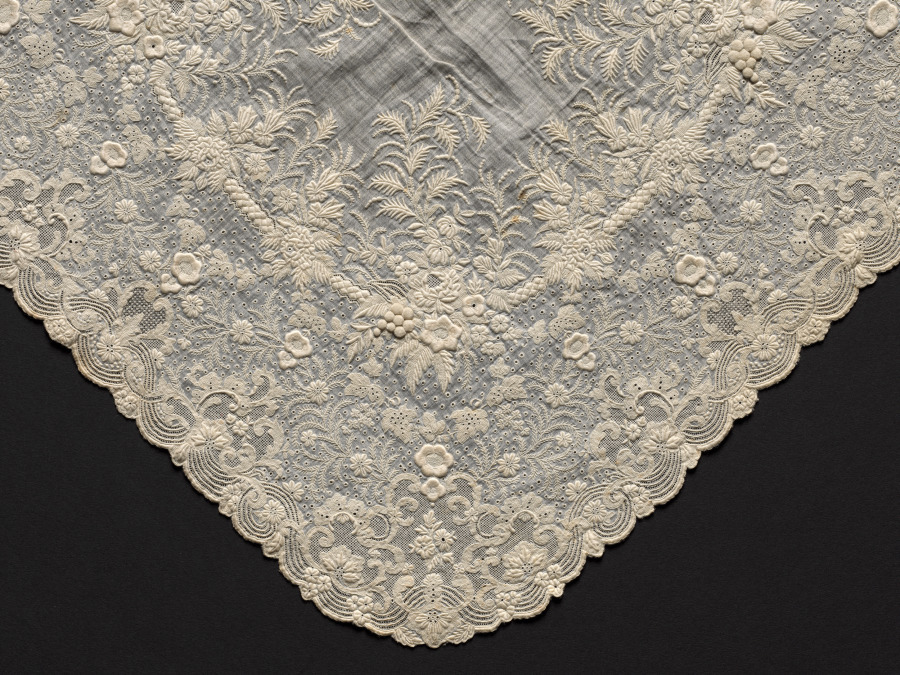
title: Lace Handkerchief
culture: Switzerland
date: 1800–1820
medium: Plain weave linen: needle lace (drawnwork) and embroidery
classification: Embroidery